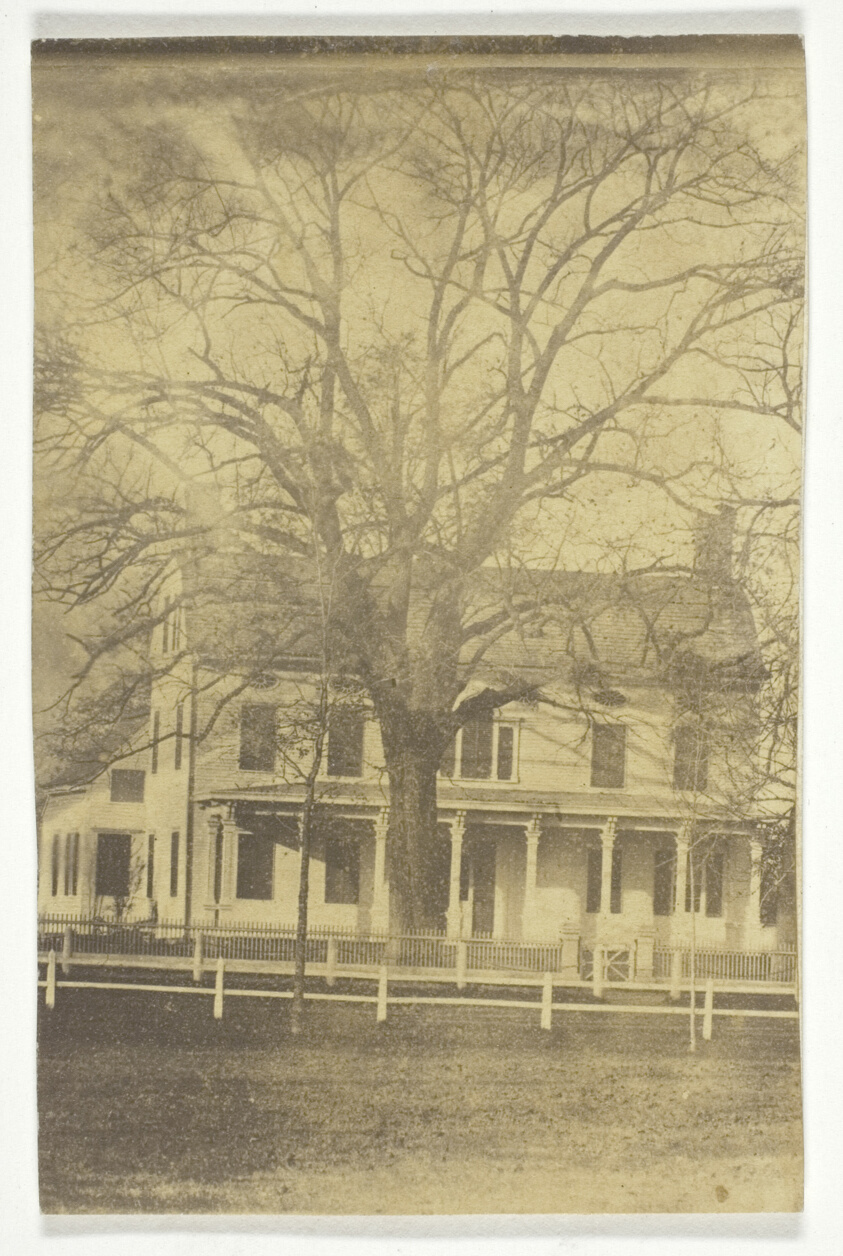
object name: Photograph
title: Chittendon House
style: 19th century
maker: Artist unknown; American, 19th century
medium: Albumen print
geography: United States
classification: photographic process; photography; card photographs; photograph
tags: Collected by Hugh Edwards